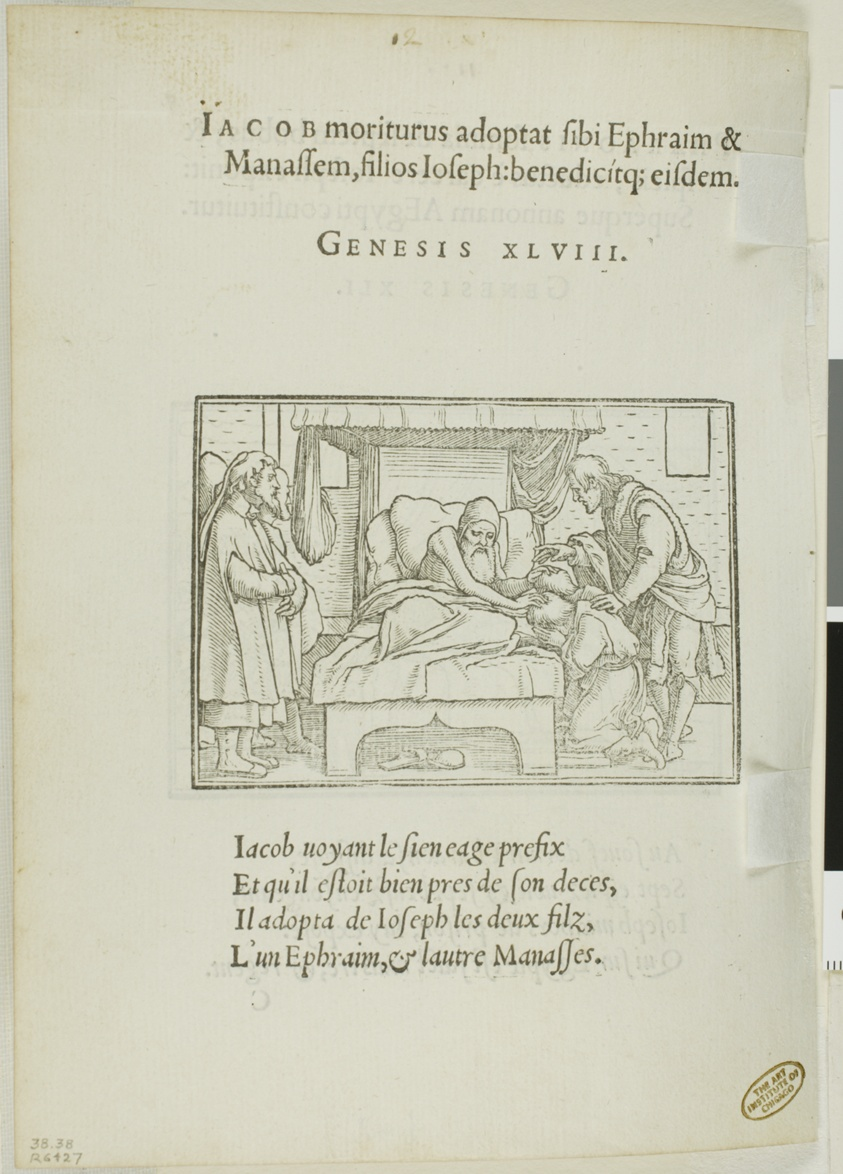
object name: Print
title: Pharoah's Dream (recto); Jacob Adopts Sons of Joseph (verso)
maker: Hans Holbein, the younger (German, 1497-1543)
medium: Woodcut on paper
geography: Germany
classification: woodcut; print; prints and drawing